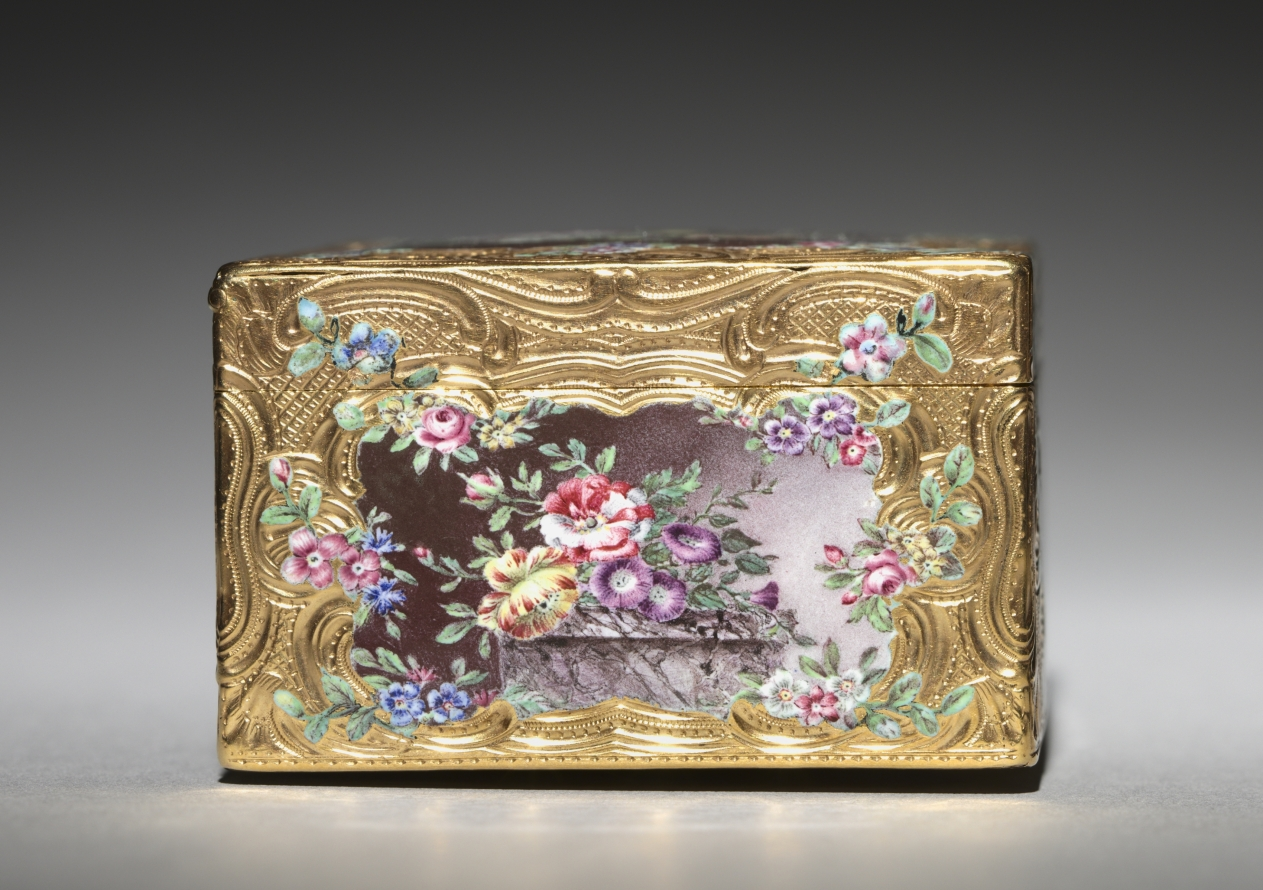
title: Snuff Box (Tabatière)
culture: France, 18th century (style of Louis XV)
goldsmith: Francois Guillaume Tiron (French)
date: 1756–57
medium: gold and enamel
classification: Miscellaneous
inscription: [Maker's mark of Francois-Guillaume Tiron, master goldsmith in 1747, inside cover; left wall]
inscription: [Warden's mark for Paris, 1756-1757, inside cover]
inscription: [Charge mark of Julien Berthe, Paris, 1750-1756, inside cover; left wall]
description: The miniature paintings that decorated snuff boxes were depicted in intricate detail requiring complex technical skill. This box’s miniatures are painted with enamel en plein, meaning the enamel has been applied directly to the metal of the box. A different enameling technique, basse-taille, is used to depict the doves and floral borders. Here, the gold has been chiseled away and filled with translucent enamel in order to produce a three-dimensional effect.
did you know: In the mid-1700s François-Guillaume Tiron worked alongside his brother, Jean-Marie Tiron, one of the most celebrated makers of gold boxes of the 18th century.